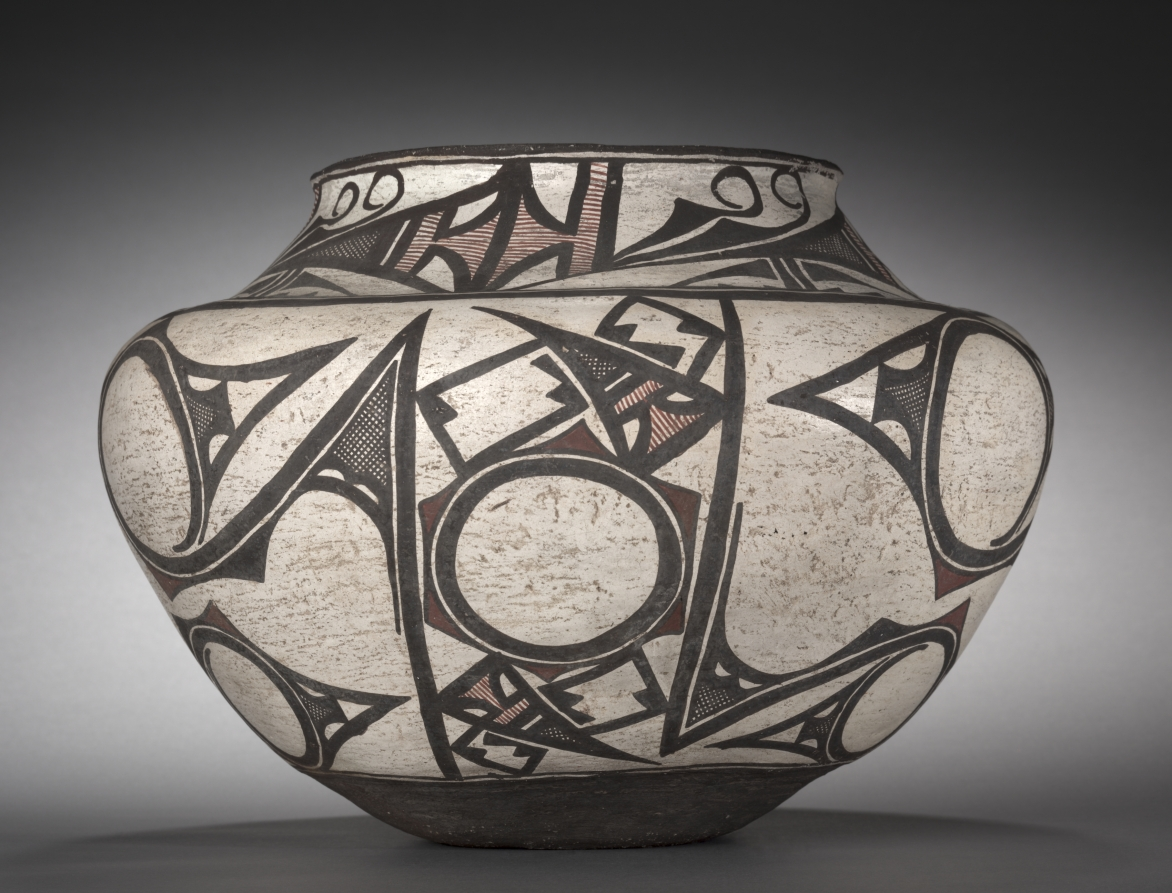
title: Water Jar (Olla)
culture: Native North America, Southwest, New Mexico, Zuni (A:shiwi) Pueblo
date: 1880s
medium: ceramic, slip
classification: Ceramic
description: The underside of this Zuni (A:shiwi) jar (olla), made by a woman to collect and store water in the 1800s, curves upward to allow the jar to be carried atop the head. Today, this traditional skill is celebrated by the Zuni Olla Maidens, a nationally known dance group that performs while balancing ollas on their heads. Ollas naturally keep water cool via evaporation through their porous walls, a valuable trait in the desert Southwest. Many Zuni say that water from an olla tastes better than water from a tap.